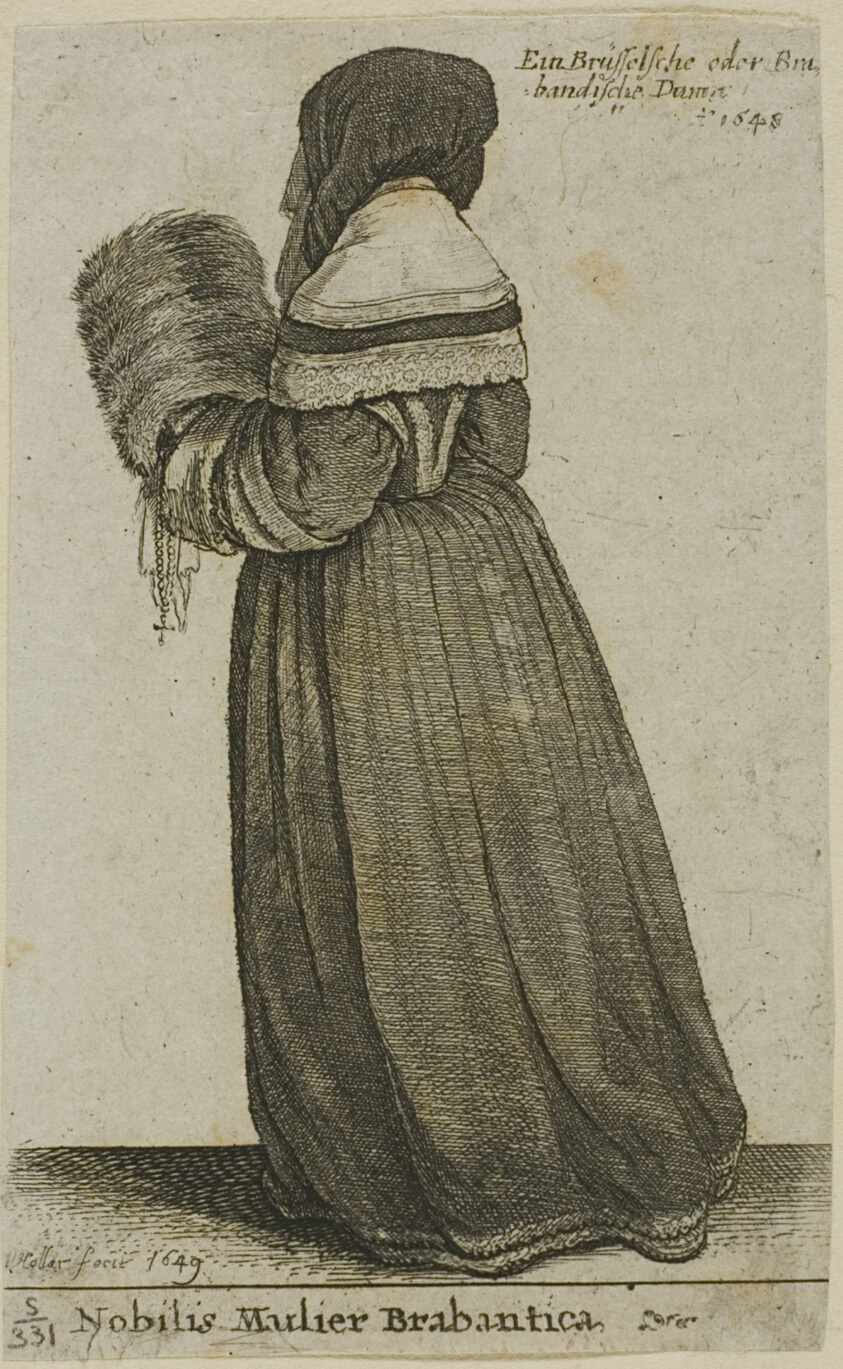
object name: Print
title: Brabant Noblewoman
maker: Wenceslaus Hollar (Bohemian, 1607-1677)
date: 1649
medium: Etching on gray Asian paper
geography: Bohemia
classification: etching; print; prints and drawing